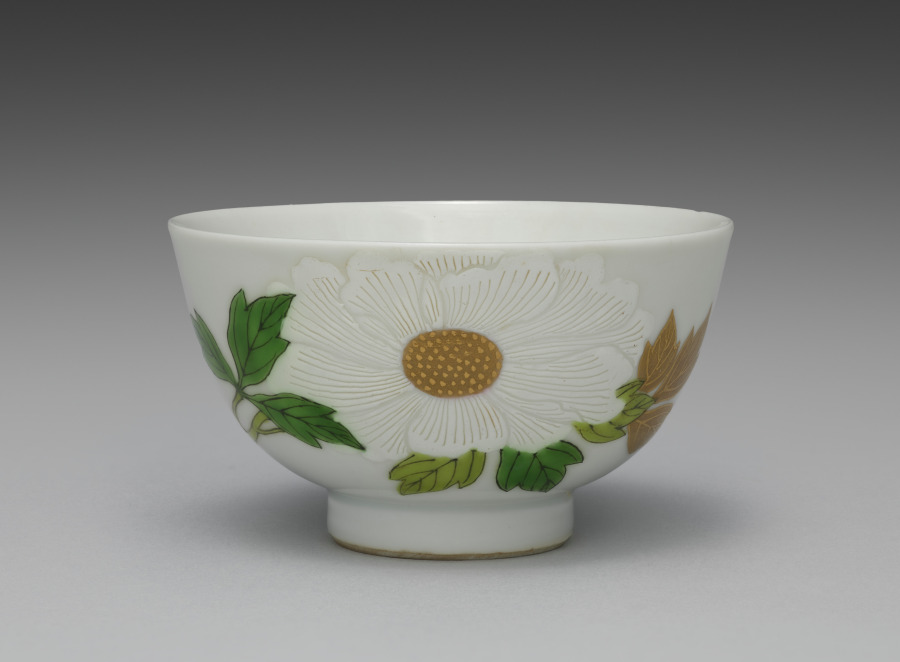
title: Teabowl from Teabowls with Peony and Crabapple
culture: Japan, Meiji period (1868–1912)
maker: Seifū Yohei III (Japanese, 1851–1914)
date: 1893–1914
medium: One from a set of five teabowls; porcelain with underglaze and overglaze color enamels and gold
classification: Ceramic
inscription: 清風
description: Overglaze color enamels are generally called iro-e (literally “color picture”) in the terminology customarily used for porcelain decoration of the Edo period. This set of teabowls is a fine example of Yohei III’s skilled use of the technique, which is identified on this set’s box lid with the alternate phrasing “porcelain with color painting” (jisaiga). Distinct from the way overglaze colors were used in Kakiemon ware from Arita, his designs and applications show a consciousness of porcelain decoration of the Qing dynasty. Here, he combines Chinese models with a sensibility taken from Kyoto ware precedents, including painting with powdered gold (kinrande). The colors used in the bowls are as follows: blue, black, gold, white, light green, green, and pink. The blue appears only inside the footring, as a double band of underglaze color. The black iron, used for stems and leaf veins, is painted over the glaze. The gold, also painted over the glaze, is used for leaves and the centers of flowers, for solid, glossy lines defining detail, or as a semimatte ground. The white of the peony flower is built up to a low relief over the glaze. Yohei has incised lines of varying widths into the pigment, carving away to the bowl’s surface, to differentiate individual petals and their rippled shapes. The light and dark greens, as well as the pink, are painted over the glaze. Of note is how Yohei has first used thinly applied lines of light green to draw the plum branch before applying the opaque iron black. For the plum buds and flowers, he has used a diluted pink with an opaque pink for outline, both over the glaze. In his later works, Yohei used pink both over and under the glaze in a manner similar to underglaze blue, and it can be challenging in some cases to discern which technique he has used. A lidded container in a private collection has a similar design but is augmented with the inclusion of white and purple magnolia blossoms. In contemplating the original decorative program of a set, of which these teabowls may have been a part, it is worth considering that perhaps not all objects included the full range of motifs. In such cases, the composition of the individual object may be best understood within the context of the extended ensemble. Here, the delicate pink plum on one side of the bowl seems slightly unbalanced with the bold white peony on the other, but when seen with other objects with the magnolia and its additional colors and shapes, it is possible to imagine a set with a complex, balanced design across multiple pieces.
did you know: Yohei III used the kinrande technique of painting with powdered gold to embellish the flowers.